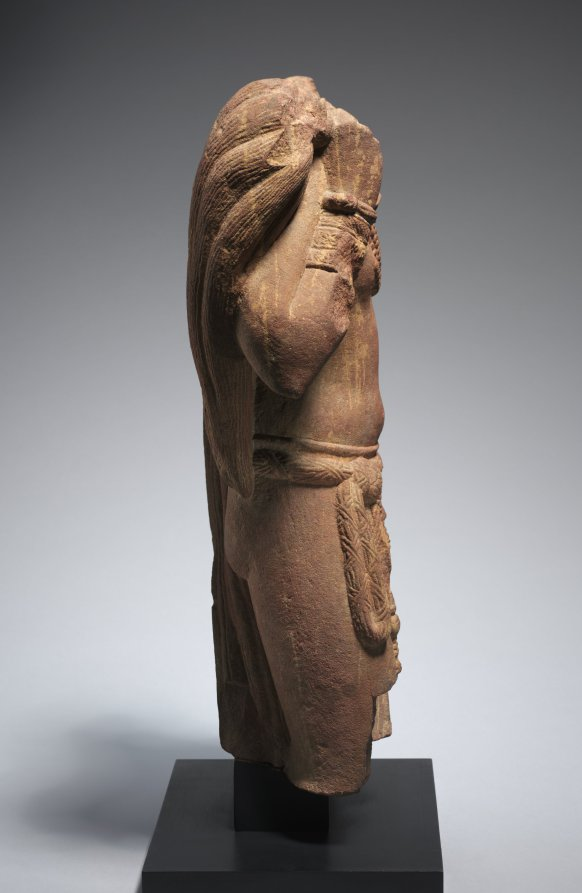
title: Attendant Bearing a Fly Whisk (Chauri)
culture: Northern India, Uttar Pradesh, Mathura, Kushan period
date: c. 100–150 CE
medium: red sandstone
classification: Sculpture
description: This figure would have been one of two flanking a king, the Buddha, or other royal or holy figure. The relaxed stance indicates that he is an attendant, rather than a central icon. Early depictions of the Buddha in India frequently have images of chauri-bearers on either side. They are identifiable as nature divinities called yakshas during this period, but in later periods the Buddha's attendants can be recognized as specific bodhisattvas, who are beings on the path to enlightenment.